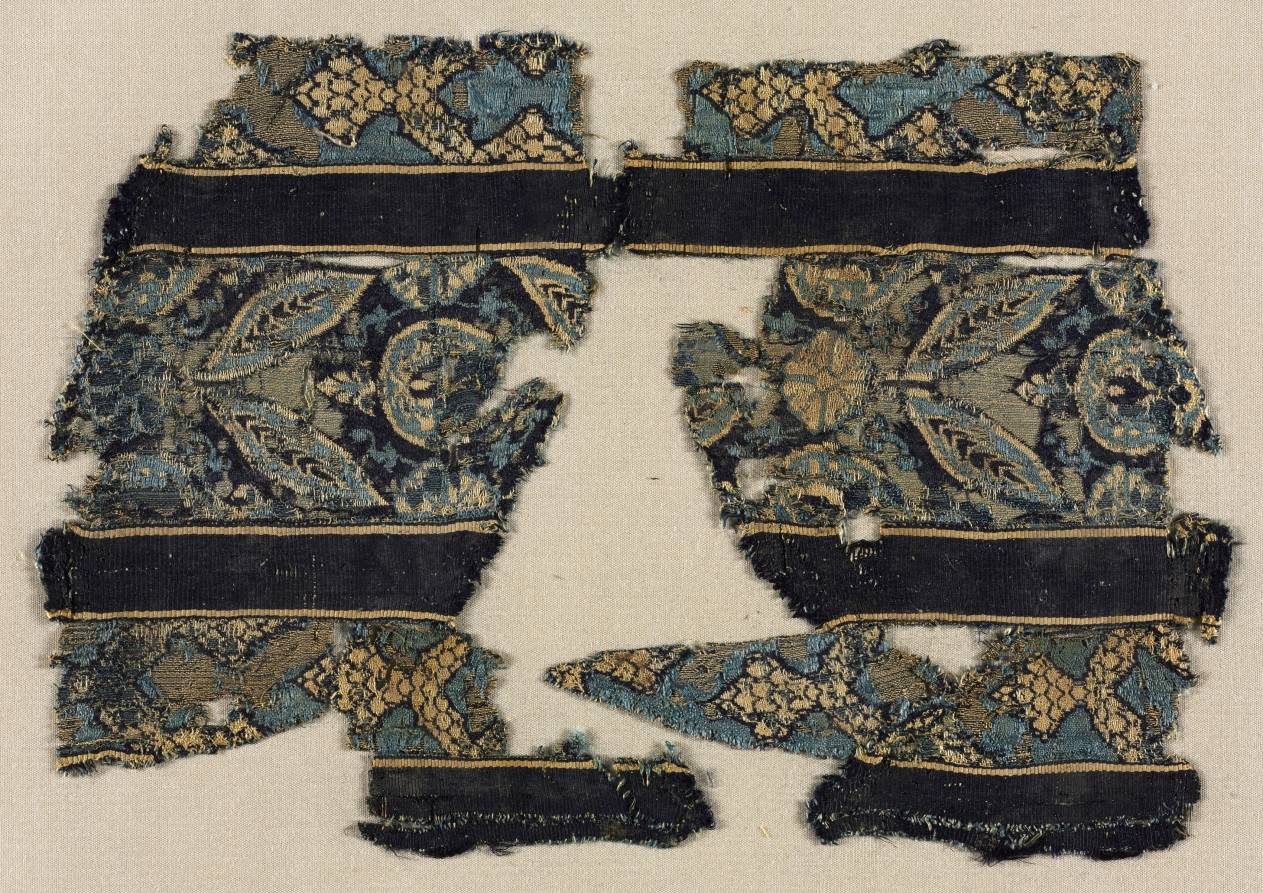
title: Textile fragment, probably part of a garment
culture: Egypt, Mamluk sultanate (1250–1517)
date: 1300s - 1400s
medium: double cloth weave; silk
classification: Textile